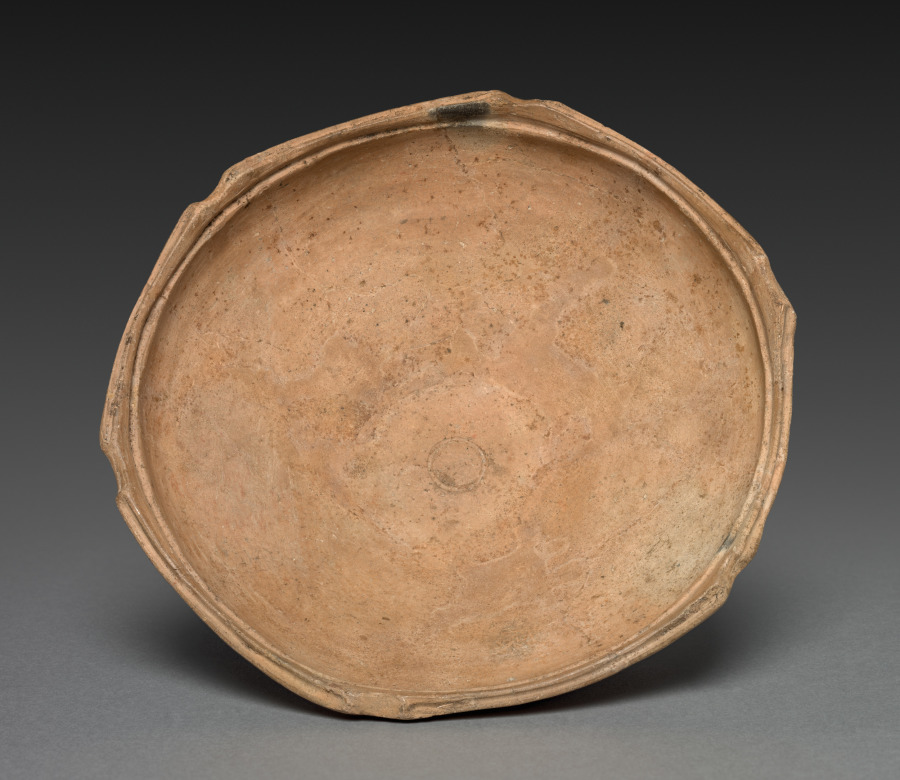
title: Pedestalled Dish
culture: Japan, Jōmon period (c. 10,500–300 BCE)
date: c. 1000–500 BCE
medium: burnished earthenware with carved and impressed decoration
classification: Ceramic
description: The Jomon period (10,500-300 BC) marks the beginning of the Japanese ceramic tradition, one of the most vibrant in world history. Major features such as an emphasis on asymmetrical silhouettes, great attention to surface texture, technological simplicity, and ambivalence to bright color already appear in this era. Late Jomon vessels are typically formed of a dense clay paste, and during this period, smaller serving vessels appear, in contrast to earlier deep storage or cooking vessel shapes. New types of surface decoration-carved rather than impressed into the clay body-herald the arrival of a distinctive aesthetic. The attachment of the pedestal to this shallow bowl, as well as the vessel's rather thin walls, also identify a new stage in ceramic production in Japan.